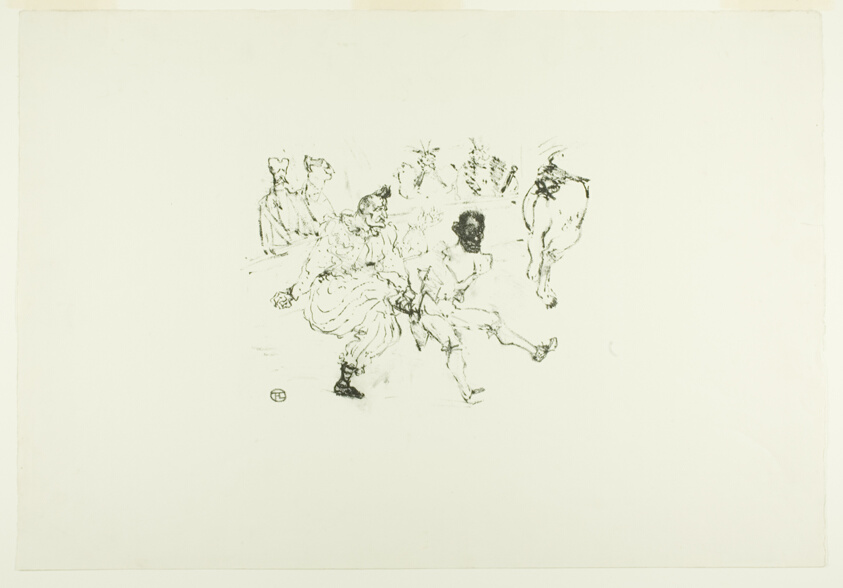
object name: Print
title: Footit and Chocolat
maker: Henri de Toulouse-Lautrec (French, 1864-1901)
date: 1894, printed 1939 or 1947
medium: Lithograph on ivory wove paper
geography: France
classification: lithograph; print; prints and drawing